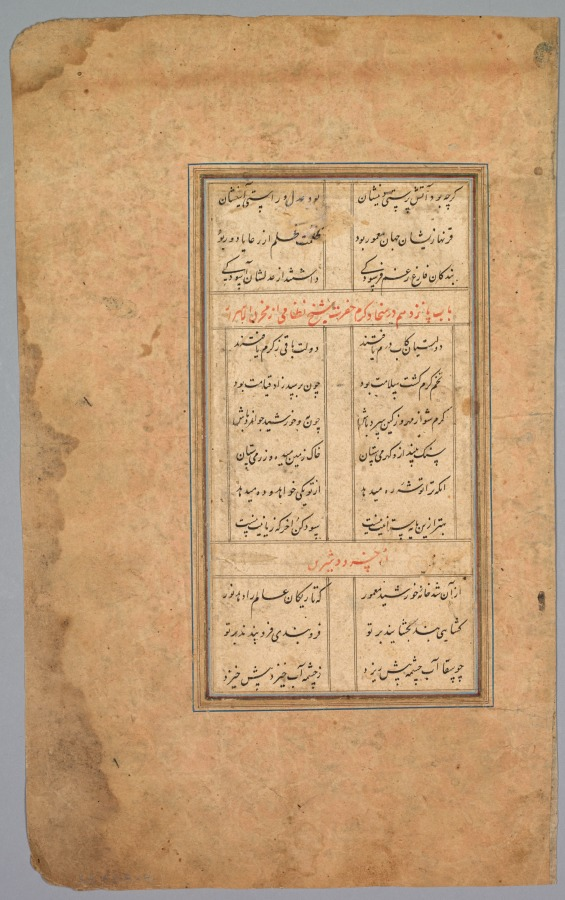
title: School Exercise Alphabet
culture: India, Mughal Dynasty (1526-1756)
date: 18th century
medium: ink on paper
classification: Manuscript